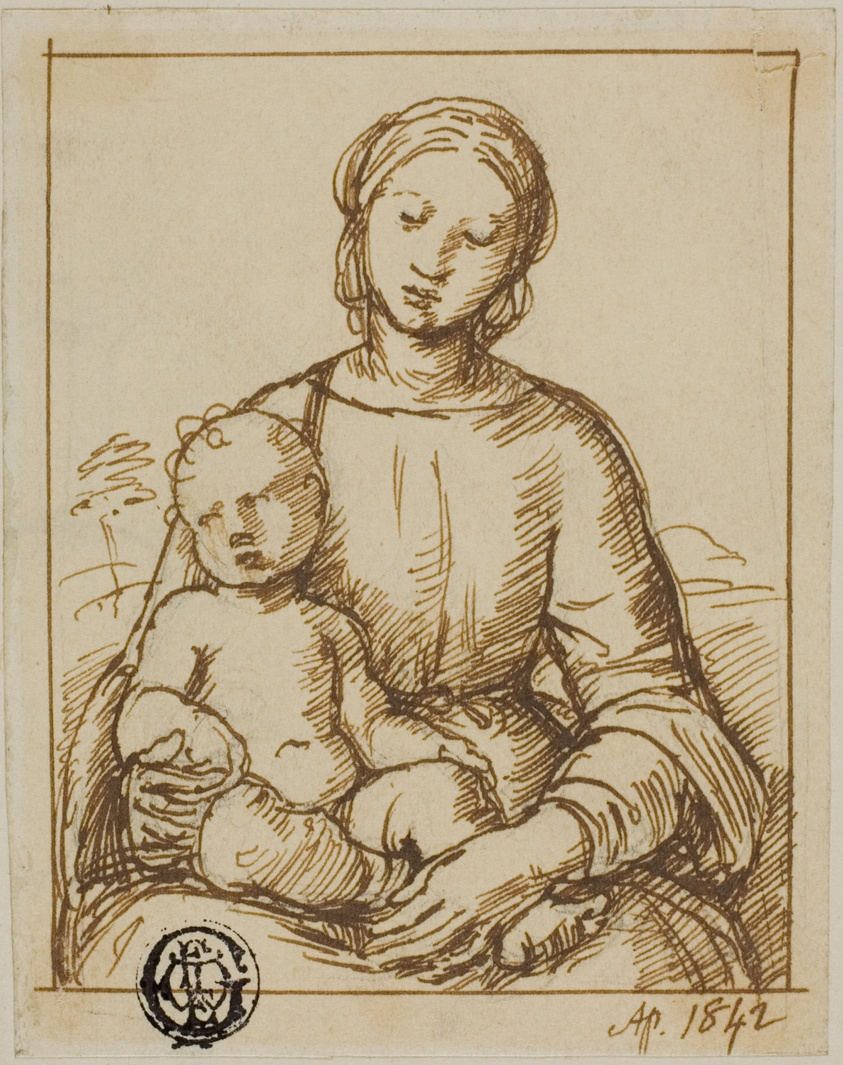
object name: Drawing and Watercolor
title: Madonna and Child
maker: Style of Raffaello Sanzio, called Raphael; Italian, 1483-1520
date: 1842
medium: Pen and brown ink, over traces of graphite, on cream wove paper, laid down on ivory board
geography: Italy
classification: pen and ink drawings; drawings (visual works); prints and drawing